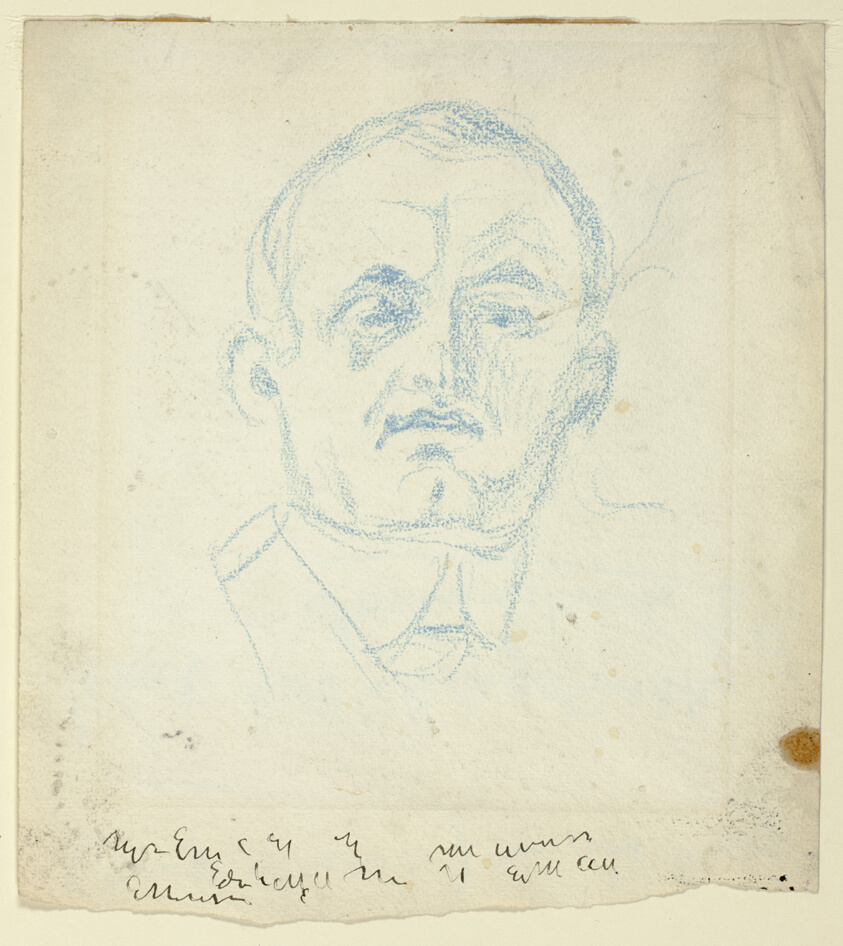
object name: Drawing and Watercolor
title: Self-Portrait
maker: Edvard Munch (Norwegian, 1863-1944)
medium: Blue crayon on paper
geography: Norway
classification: crayon; drawings (visual works); prints and drawing